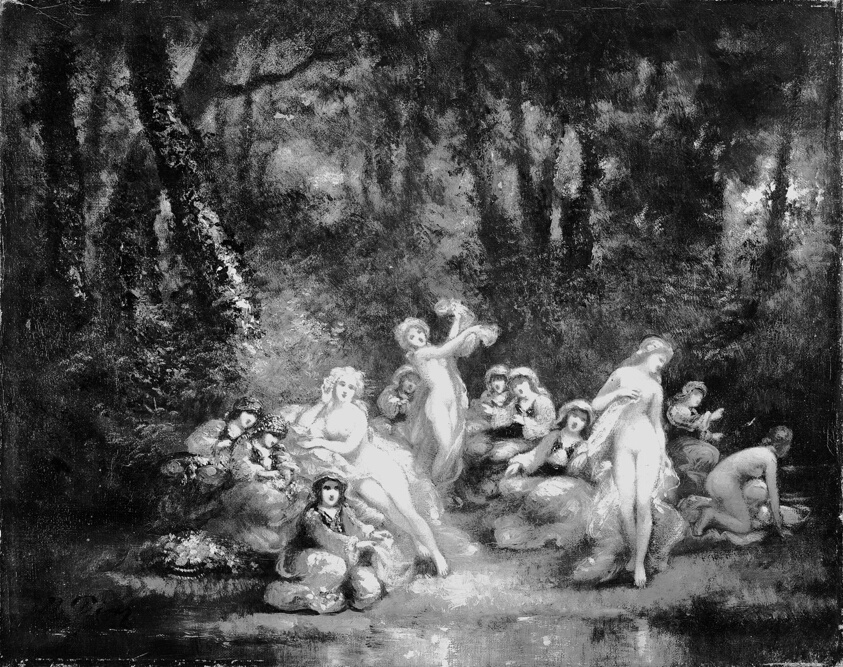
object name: Painting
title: In the Woods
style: Barbizon School, 19th century, nineteenth century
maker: Imitator of Narcisse Virgile Diaz de la Peña (French, 1807-1876)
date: c. 1860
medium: Oil on canvas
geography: France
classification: oil on canvas; oil paintings (visual works); french; france; painting; european painting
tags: nudes, bathers, figures, forests, France, French, nature, trees, water, women